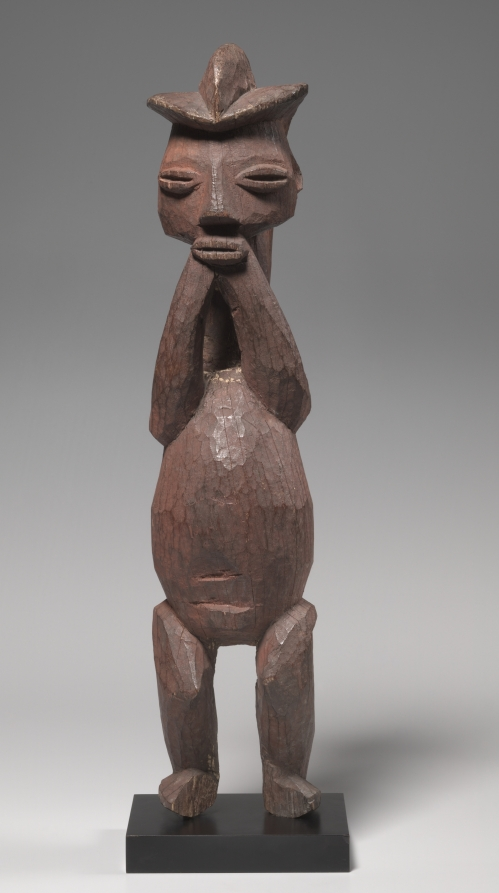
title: Male Figure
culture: Africa, Central Africa, Democratic Republic of Congo, Hungaan-style maker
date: mid- to late 1800s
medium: Wood and colorant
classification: Sculpture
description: Hungaan figures of this size served as guardians of ritual shrines and functioned in rituals to promote fertility, guarantee well-being, and ensure longevity. The striking crested hairstyle imitates a real coiffure or a wig, indicative of status and prestige. The hands supporting the chin identify the figure as a chief who is immersed in thought and contemplation, pondering over his responsibilities.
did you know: The red powdery surface of this figure mimics a red body adornment that mixed ground camwood with palm oil.